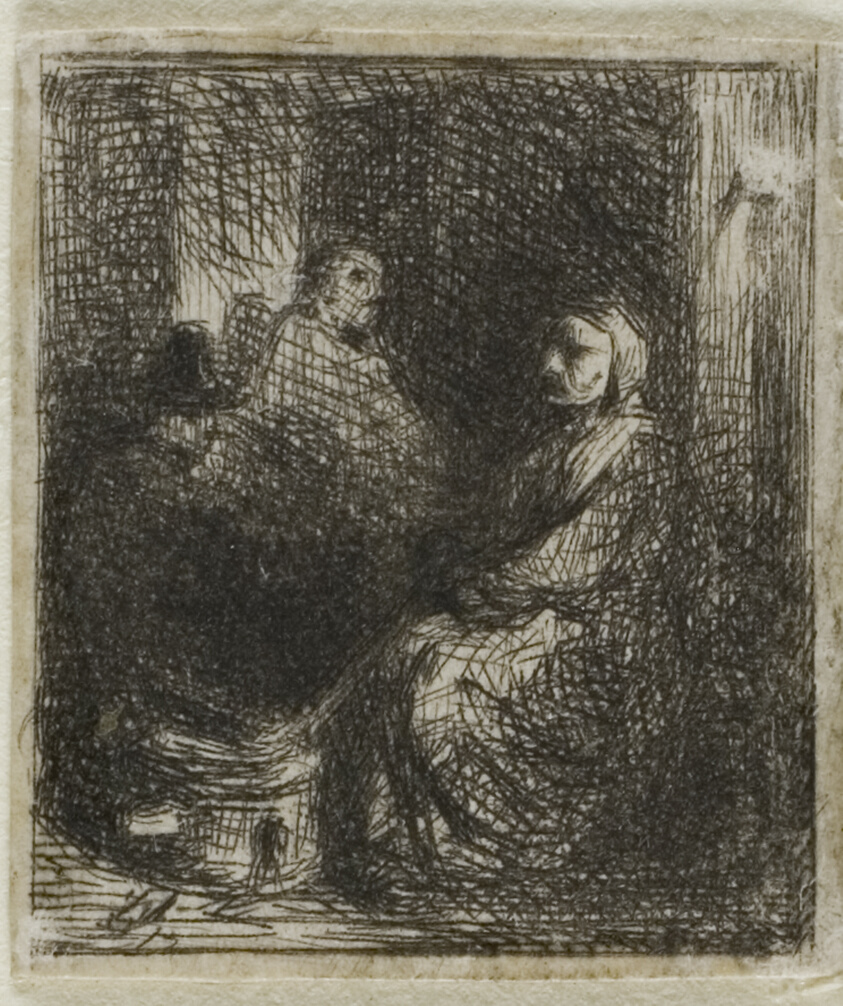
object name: Print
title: Woman Selling Fried Food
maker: Charles Émile Jacque (French, 1813-1894)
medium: Drypoint on ivory wove paper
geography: France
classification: drypoint; print; prints and drawing